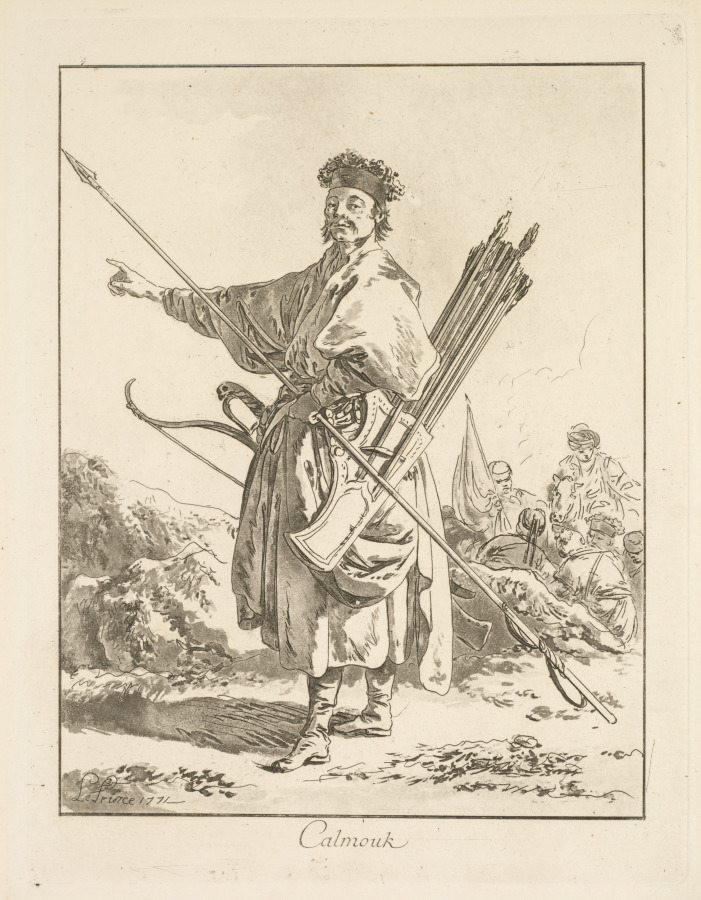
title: Calmouk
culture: France, 18th century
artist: Jean Baptiste Le Prince (French, 1734–1781)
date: 1771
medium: etching and aquatint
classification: Print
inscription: signed and dated lower left, in plate: Le Princ 1771